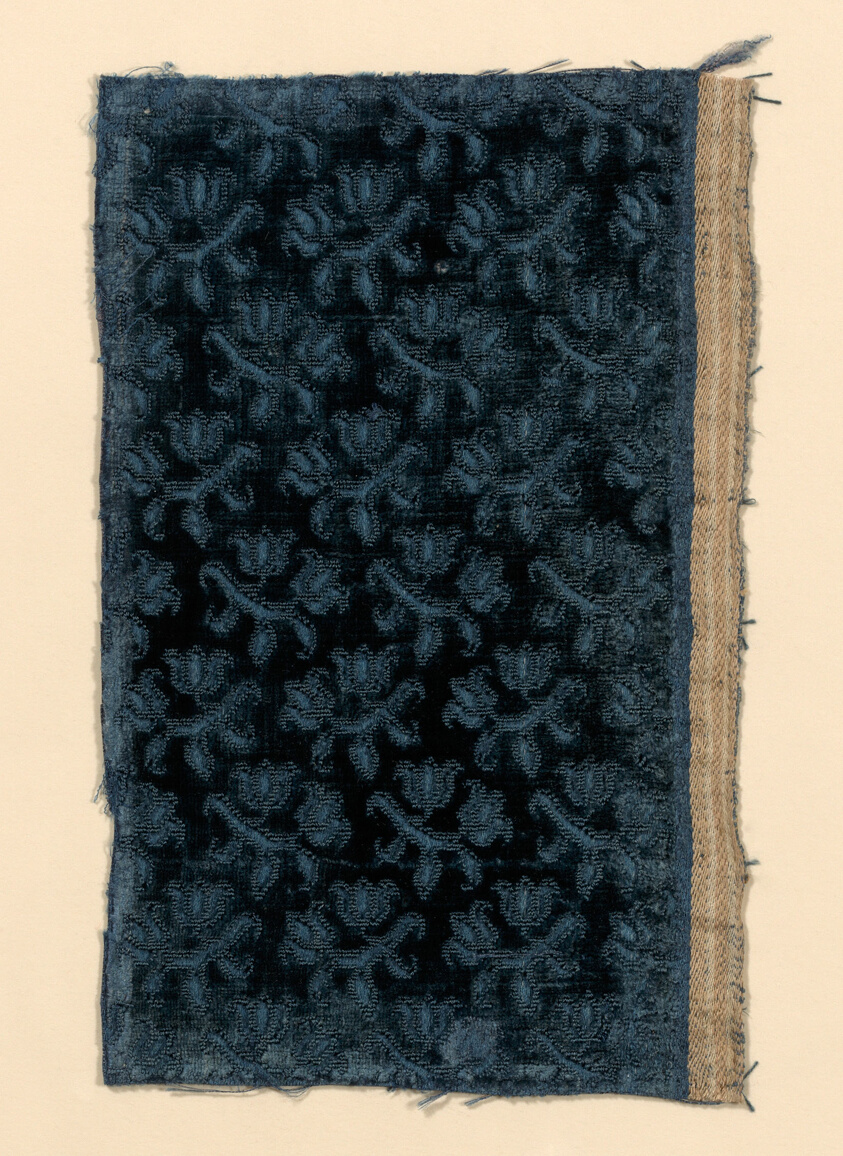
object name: Textile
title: Fragment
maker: Italy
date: Early 17th century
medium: cisele voided satin velvet. Cut and uncut velvet.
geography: Italy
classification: textile; weaving - velvet; weaving